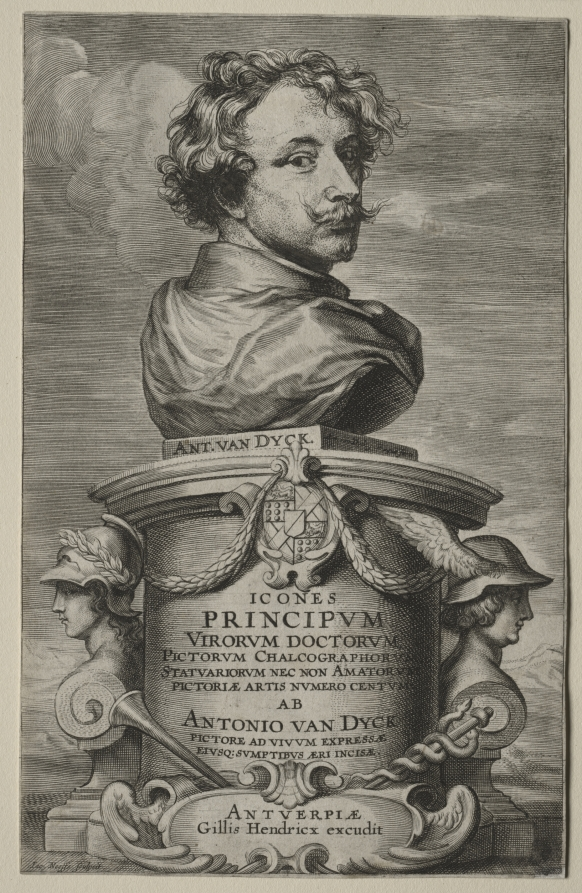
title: Self-Portrait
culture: Flanders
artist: Anthony van Dyck (Flemish, 1599–1641)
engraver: Jacobus Neeffs (Flemish, 1610–after 1660)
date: 1645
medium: etching and engraving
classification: Print